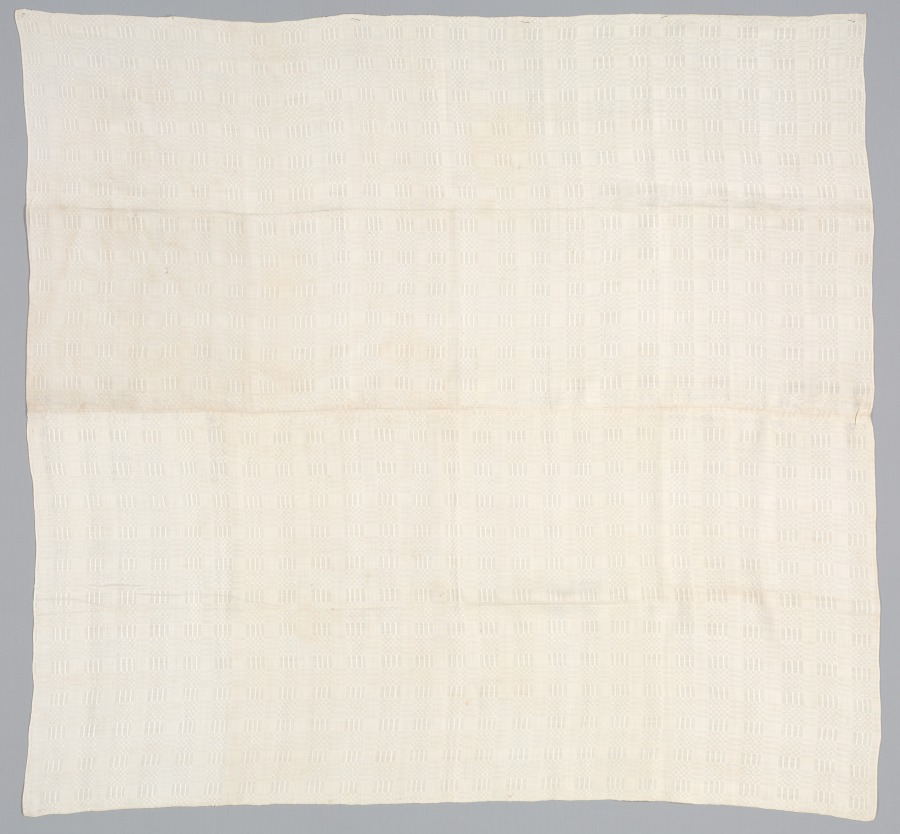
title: Tablecloth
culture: America, Connecticut, early 19th Century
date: c. 1800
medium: linen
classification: Textile